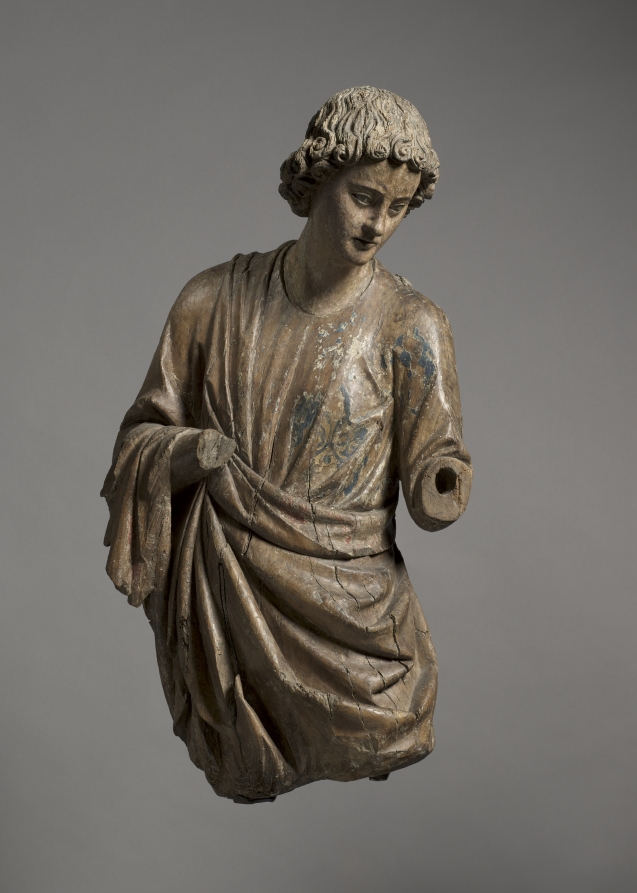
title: Angel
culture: France, vicinity of Reims, 13th century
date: c. 1250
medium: walnut with traces of gilding and polychromy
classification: Sculpture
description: Surviving in fragmentary condition, this pair of angels lacks lower arms, hands, wings, and attributes. Their original paint and gilding, now almost entirely lost, once rendered their garments a rich brocade and their hair a luxuriant gold. Nonetheless, in their graceful poses and sublime faces—which may portray tragic interest, anguish, or deep concern—their original delicacy and power are still evident. They embody the monumental style of 13th-century High Gothic cathedral sculpture in France. Their style specifically suggests they were carved in or around Reims, possibly by sculptors associated with the cathedral there. Their original placement is unknown, but they may have flanked an altar on columns.